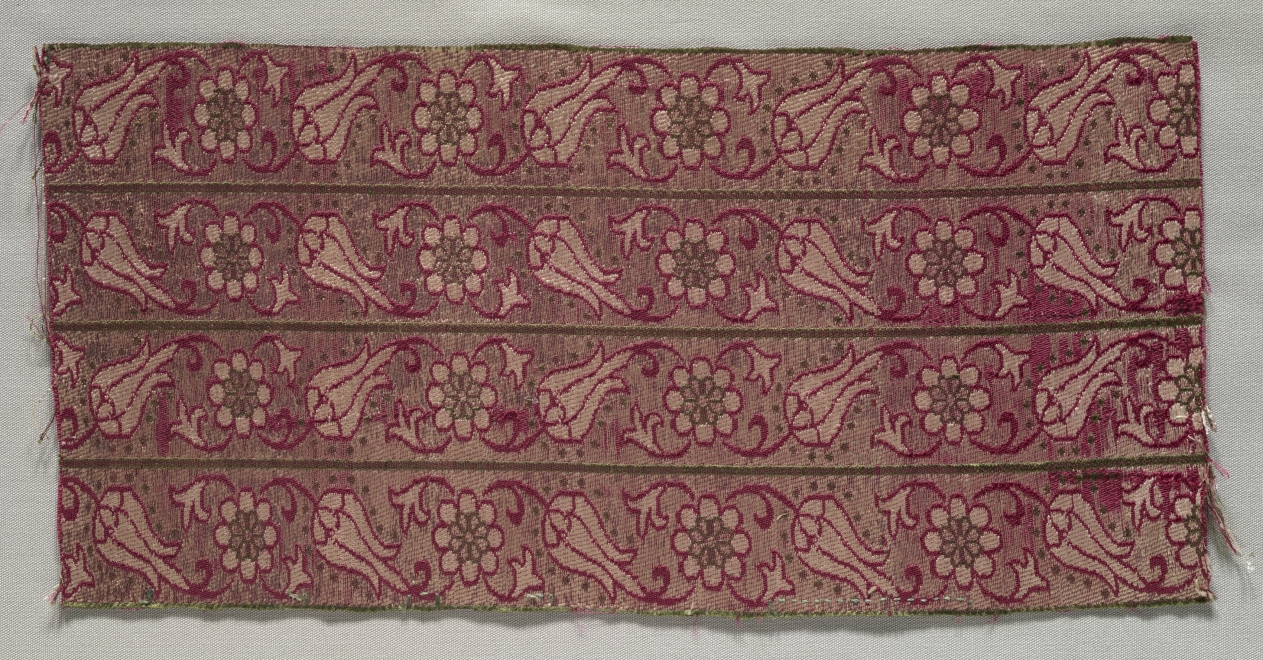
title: Textile Fragment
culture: Turkey, late 17th century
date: late 17th century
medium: brocaded silk with metal thread weft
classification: Textile